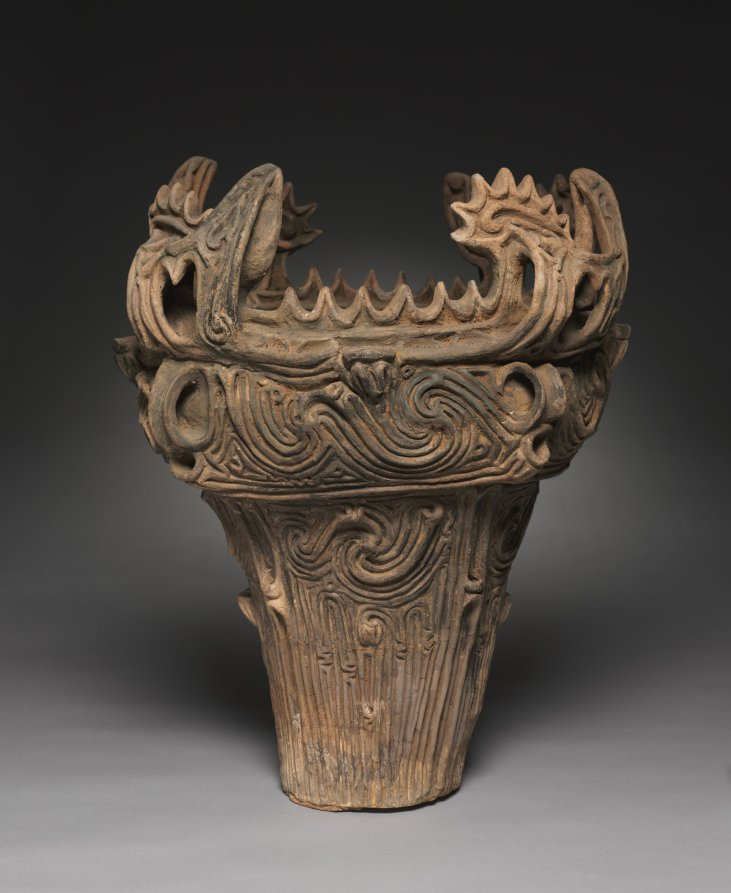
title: Fire-flame Cooking Vessel (Ka'en Doki)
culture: Japan, Jōmon period (c. 10,500–300 BCE)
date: c. 2500 BCE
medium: Earthenware with carved and applied decoration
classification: Ceramic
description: Archaeologists call this kind of vessel “fire flame,” ka’en in Japanese, because its top resembles flames. No one knows why the design was made or what it actually represents. This example is remarkable for the amount that is original. It was recently determined that a bottom from a different vessel was used during its reconstruction in the 1900s, creating a false impression of its intended scale; it would have initially been about four inches shorter. Since their lower portions were set into holes in the ground during use, bases of pots like this one often deteriorate and may be missing when they are excavated.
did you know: Scientifically tested residues from Jōmon vessels reveal that their makers consumed detoxified acorns.